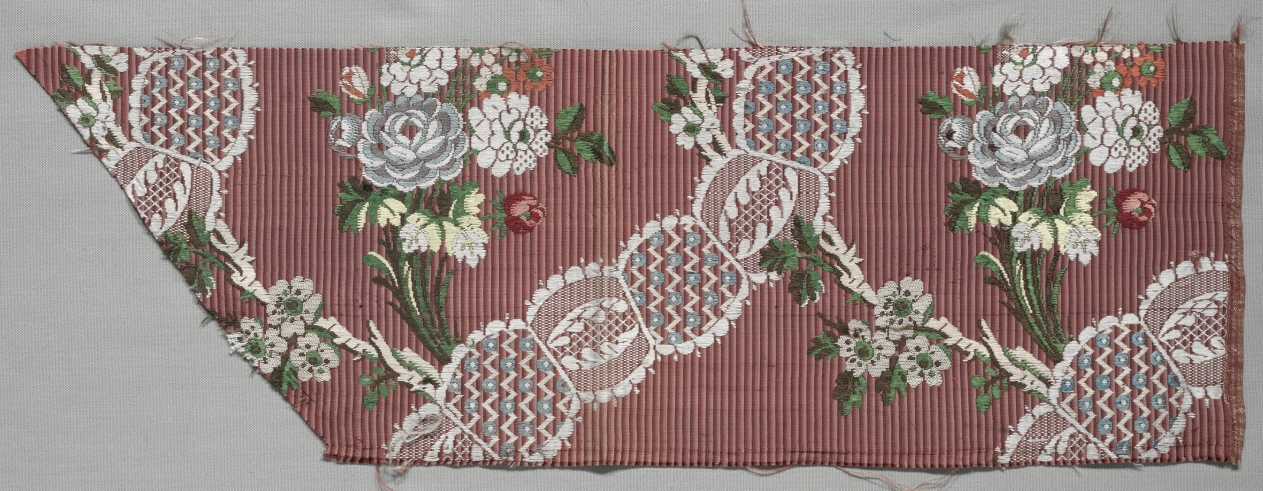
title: Length of Silk Brocade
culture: France, 18th century, Period of Louis XVI (1774-1793)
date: 1774–1793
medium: brocade, silk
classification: Textile